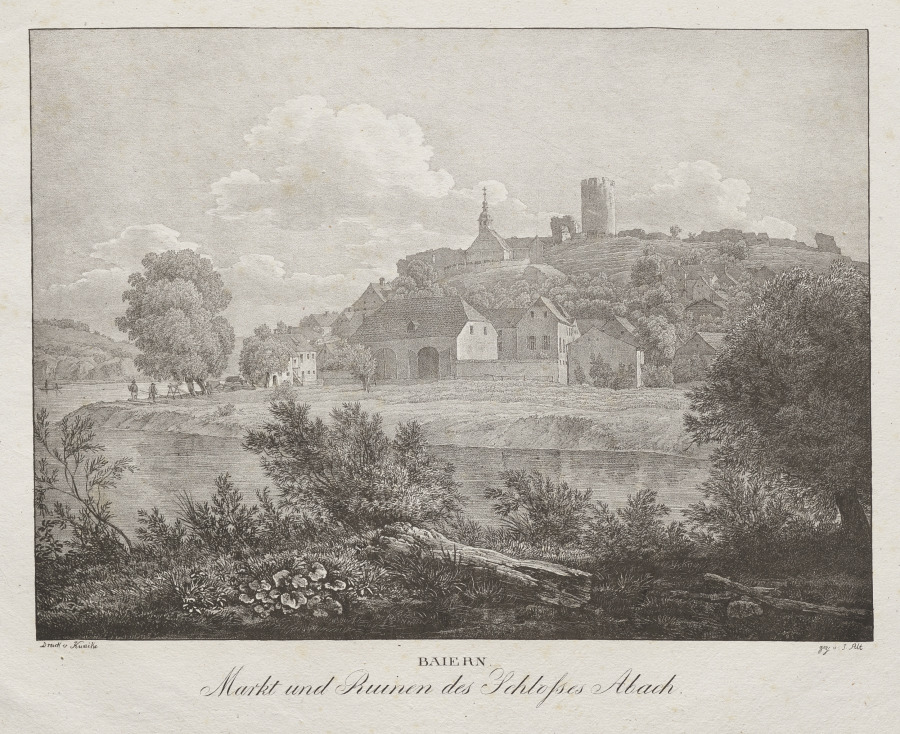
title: Baiern, Markt und Ruinen des Schlosses Abach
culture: Austria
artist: Jakob Alt (Austrian, 1789–1872)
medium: lithograph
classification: Print